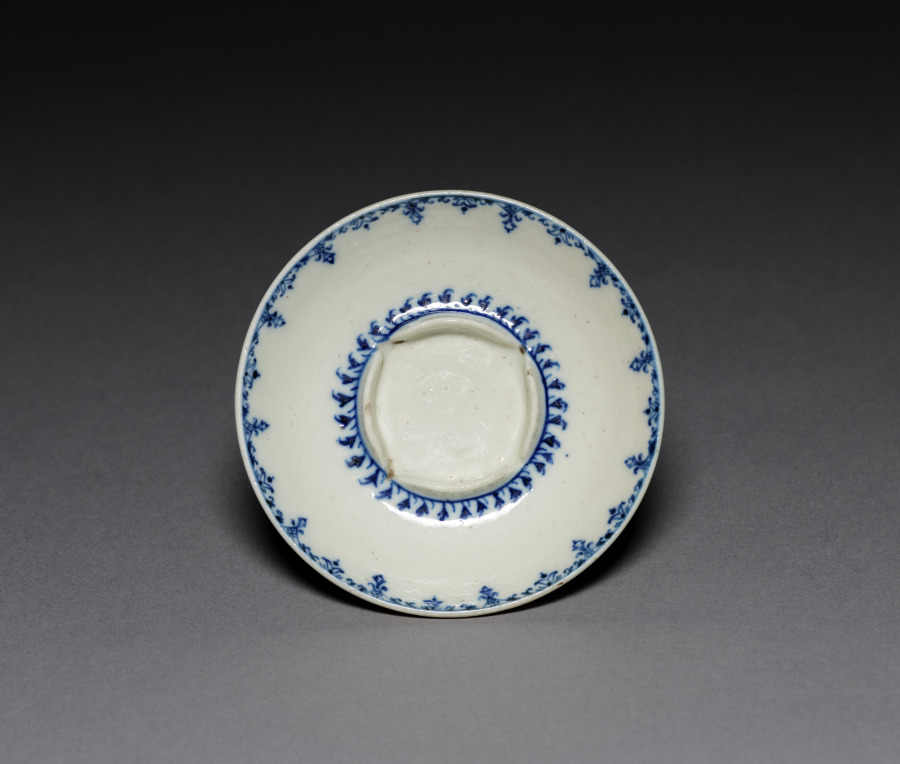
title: Saucer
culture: France, Saint Cloud, 18th century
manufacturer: Saint Cloud Porcelain Factory (French)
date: 1730–62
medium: soft-paste porcelain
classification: Ceramic